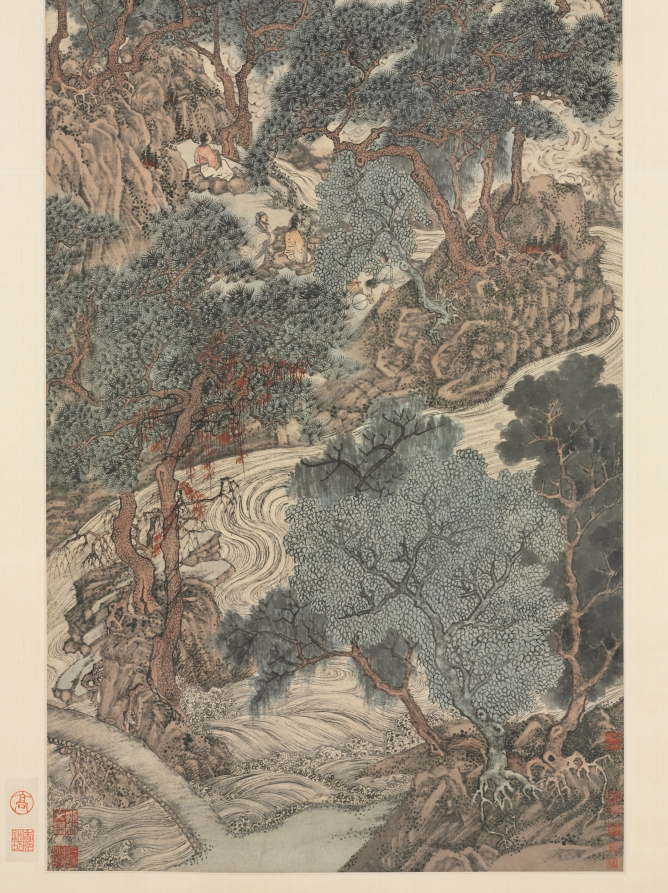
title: Morning Sun over Heavenly Citadel Peak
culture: China, Ming dynasty (1368–1644)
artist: Ding Yunpeng (Chinese, 1547-c. 1628)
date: 1614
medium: Hanging scroll; ink and light color on paper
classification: Painting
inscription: Artist's inscription, signature, and 2 seals: Clouds arise from the dale of the "Dark Plateau," The morning sun is over the peak of the Heavenly Citadel. In mid-spring of the chia-yen year of the Wan-li era [1614], painted as a fiftieth birthday present to Mr. Chung-lu. Junior Friend of Family Alliance, Ting Yün-p'eng [seals] Yün-p'eng chih yin; Ting Nan-yü.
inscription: 10 additional seals: 5 of Kao Hsiang-ling (dates unknown); 5 unidentified.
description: A birthday gift, this scroll by Ding Yunpeng from Anhui is among the earliest paintings of Mount Huang (Yellow Mountains), here depicting Heavenly Citadel Peak. The mountains are named after the legendary Yellow emperor who is said to have visited the place to look for the essence of immortality. Deep red strokes accentuate vegetation and allude to cinnabar, the alleged elixir of immortality. Difficult to climb and access, Mount Huang in Anhui province did not become a destination for hikers nor a subject for artists before the late Ming dynasty, when steps were built. Today its towering peaks are a national site and tourist attraction.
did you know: Mount Huang, known for its scenic beauty, is one of China's major tourist attractions.